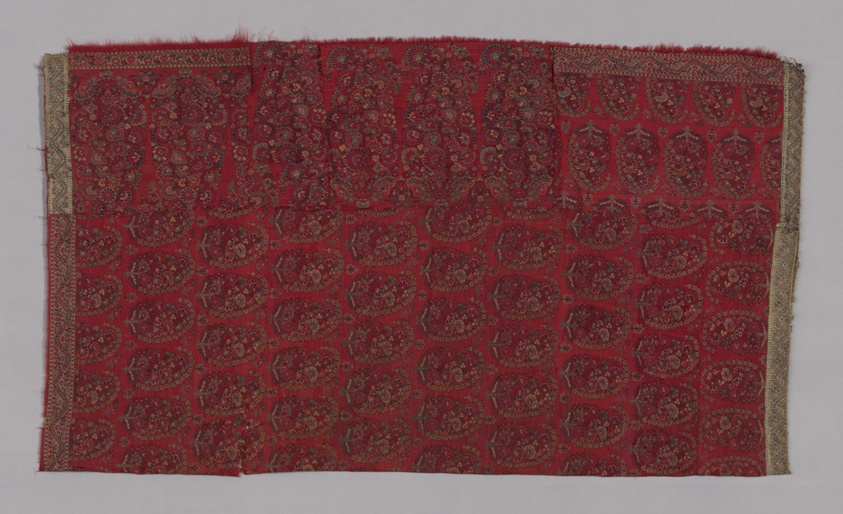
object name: Costume and Accessories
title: Shawl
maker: India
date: late 18th/early 19th century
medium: Wool, double interlocking tapestry weave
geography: India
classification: textile; weaving; costume